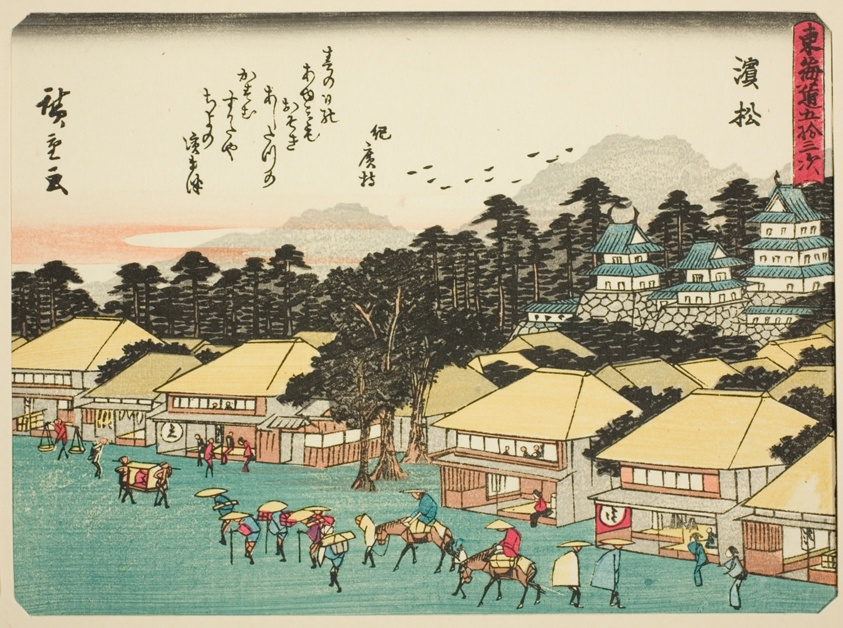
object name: Print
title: Hamamatsu, from the series "Fifty-three Stations of the Tokaido (Tokaido gojusan tsugi)," also known as the Tokaido with Poem (Kyoka iri Tokaido)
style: Japanese (culture or style)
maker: Utagawa Hiroshige 歌川 広重; Japanese, 1797-1858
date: c. 1837/42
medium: Color woodblock print; chuban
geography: Japan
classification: woodblock print; print; asian art